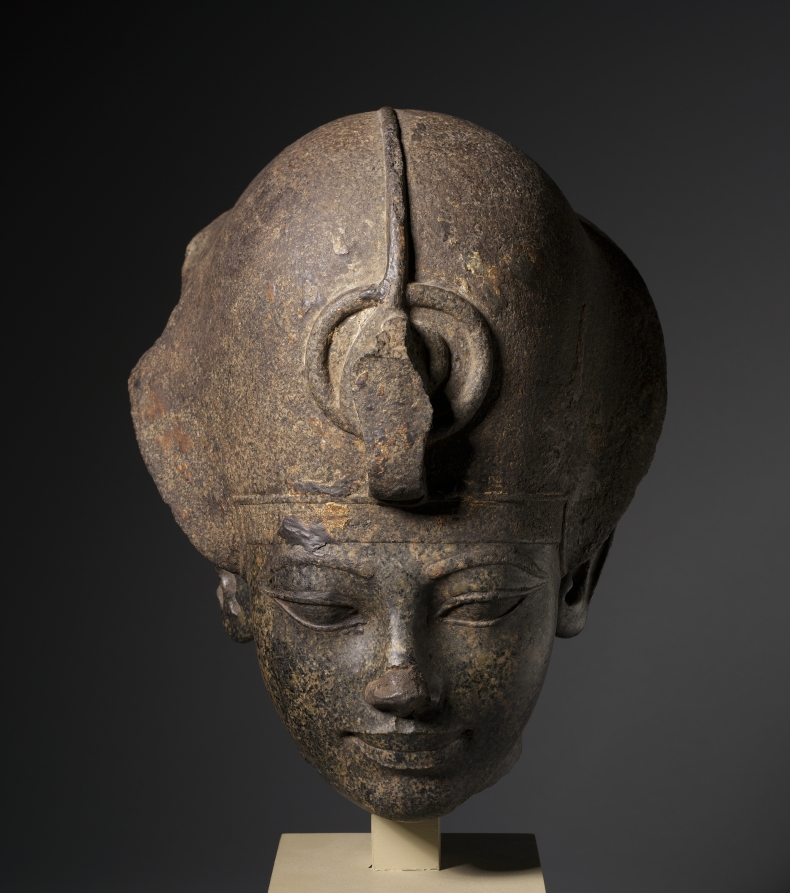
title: Head of Amenhotep III Wearing the Blue Crown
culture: Egypt, New Kingdom (1540–1069 BCE), Dynasty 18, reign of Amenhotep III (1390–1352 BCE)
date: c. 1391–1353 BCE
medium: granodiorite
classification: Sculpture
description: During the long, peaceful reign of Amenhotep III, Egypt reached a pinnacle of wealth and splendor. This magnificent portrait captures the ruler's exotic features to perfection. He has large, almond-shaped eyes, elegant arched eyebrows, and a full mouth. His face is youthful and without blemish. The bone structure is lost in the fleshy fullness of the face. The contrast between polished and roughened surfaces is a hallmark of hard stone images of Amenhotep III. The flesh areas were smoothed to a glistening sheen, while the eyeballs and the crown were left rougher. The roughening of the crown also had a practical purpose, for the upper portion was originally painted blue and the browband was painted yellow. The paint would have adhered better to the unpolished surface.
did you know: The Blue Crown or Khepresh was worn by New Kingdom Pharaohs into battle as well as in ceremonies.